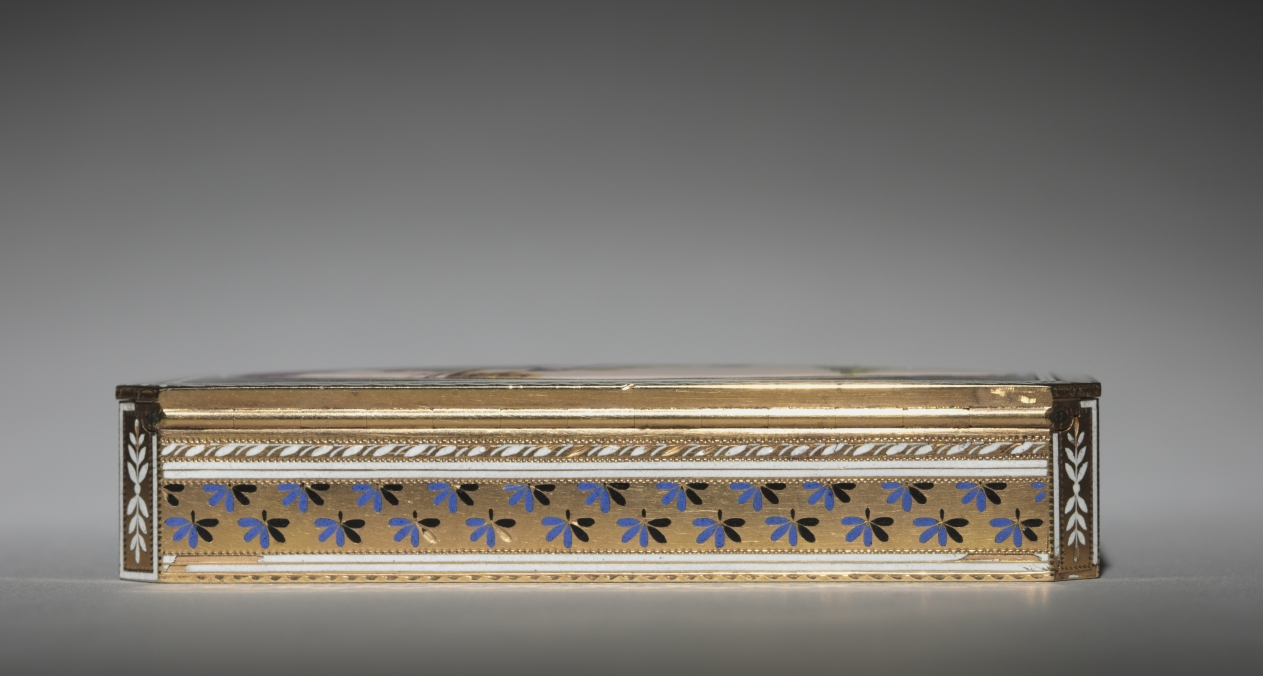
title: Box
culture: Switzerland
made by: probably by F. Joanin (Swiss)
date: c. 1810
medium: gold and enamel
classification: Miscellaneous